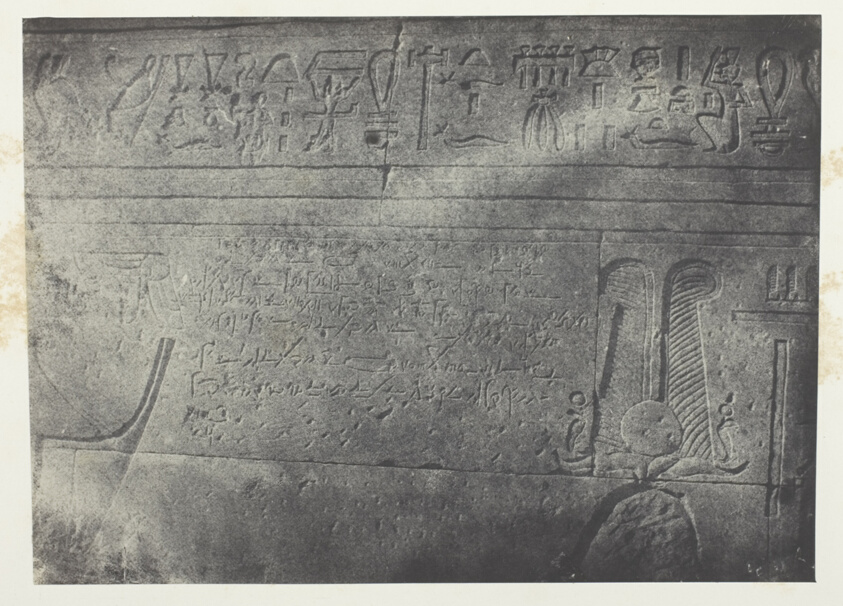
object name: Photograph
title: Grand Temple d'Isis à Philoe, Inscription Démotique; Nubie, plate 76 from the album "Egypte, Nubie, Palestine et Syrie" (1852)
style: 19th century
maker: Maxime Du Camp (French, 1822–1894)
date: 1849/51, printed 1852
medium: Salted paper print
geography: France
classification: salted paper print; photographic process; photography; photograph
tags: Collected by Hugh Edwards, Egypte, Nubie, Palestine et Syrie